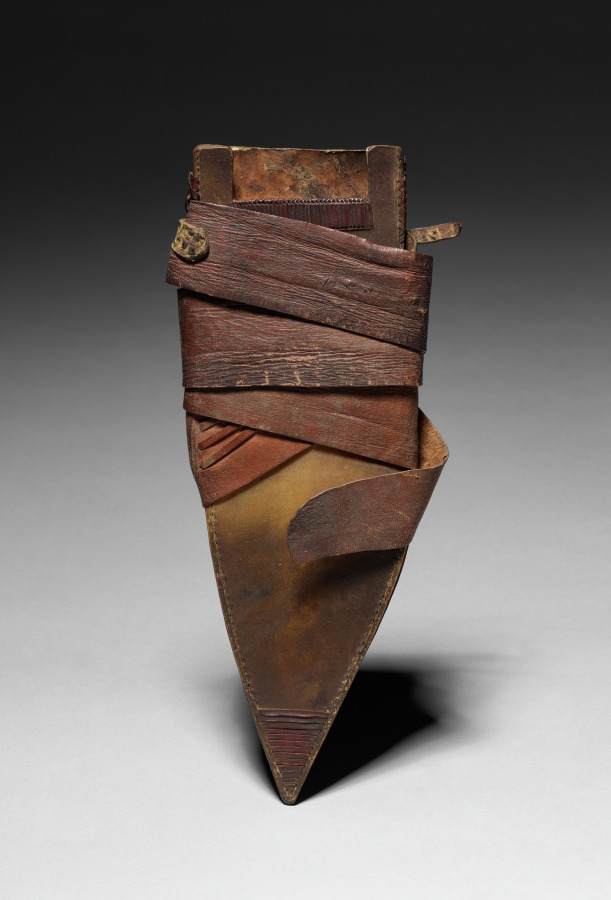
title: Sheath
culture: Africa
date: 1800s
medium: Leather or rawhide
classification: Arms and Armor